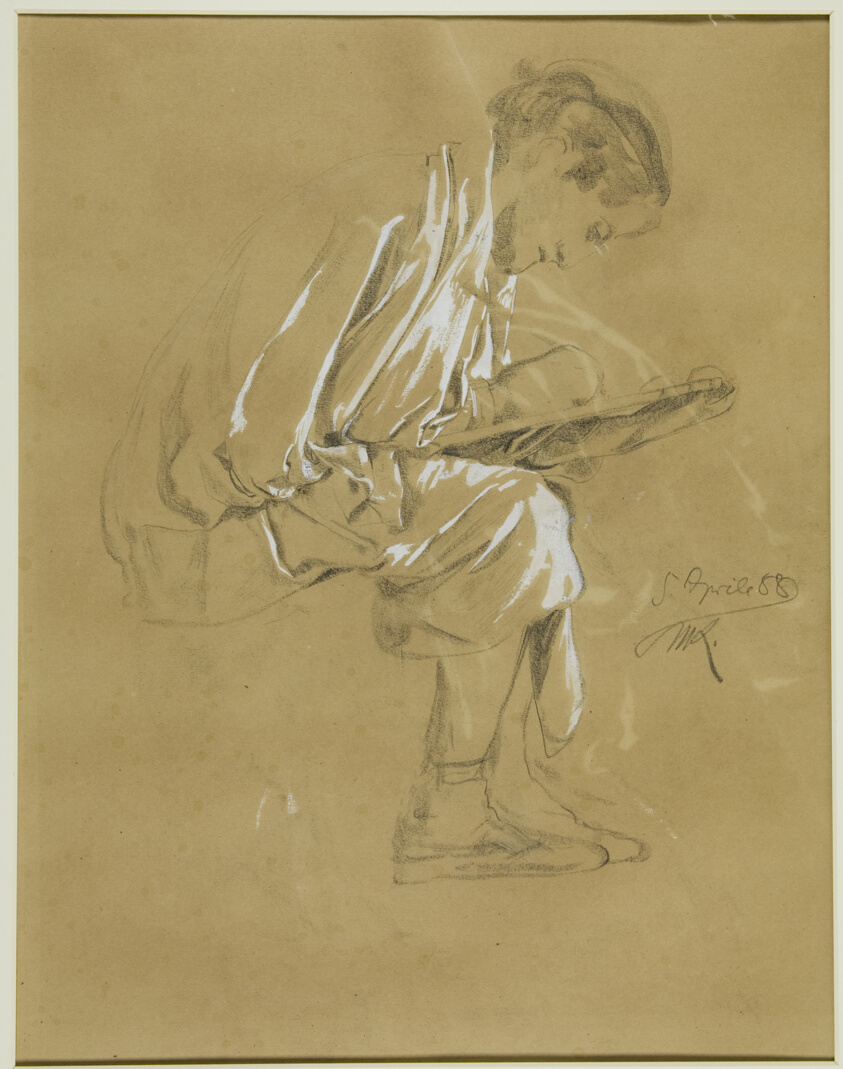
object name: Drawing and Watercolor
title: The Chronicler (recto and verso)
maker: Max Klinger (German, 1857-1920)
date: April 5, 1888 (recto); April 6, 1888 (verso)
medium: Graphite, heightened with white goauche (recto and verso), on tan wove paper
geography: Germany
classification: graphite; drawings (visual works); prints and drawing